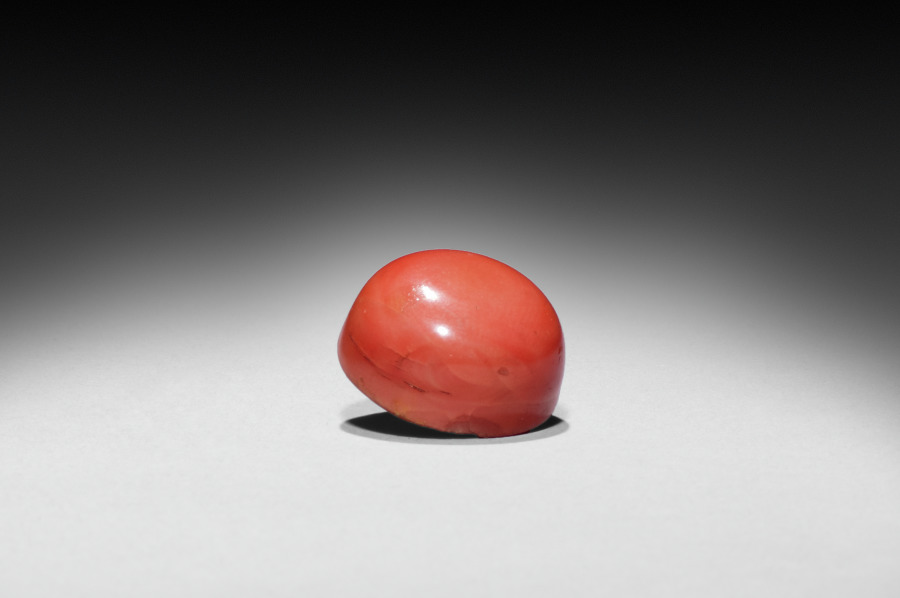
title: Flattened Ovoid Snuff Bottle with Stopper (stopper)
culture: China, Jiangxi province, Jingdezhen kilns, Ming dynasty (1368-1644), Wanli reign (1572-1620)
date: 1573–1620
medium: porcelain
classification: Ceramic